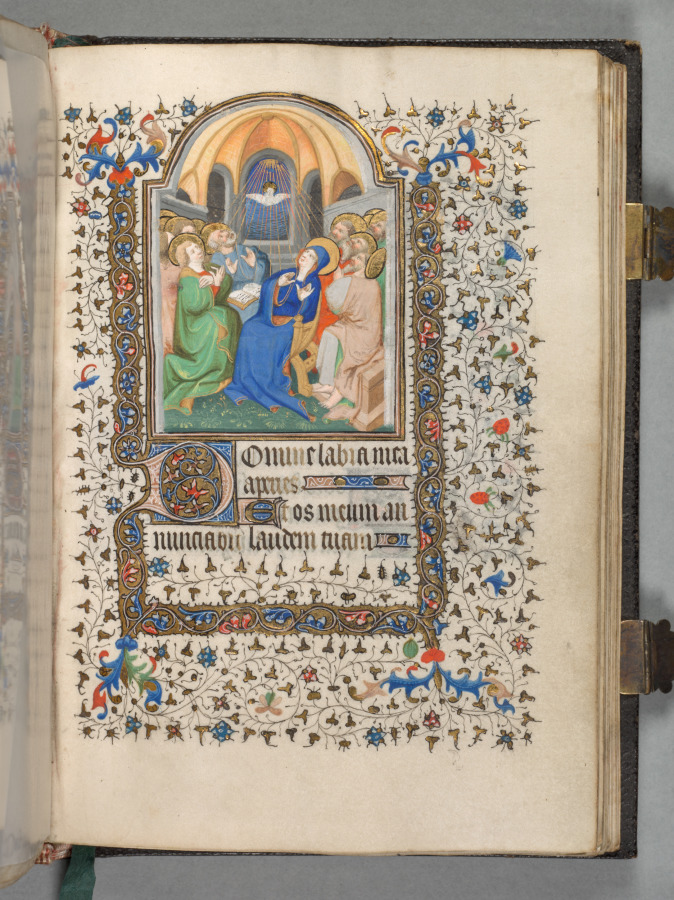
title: Book of Hours (Use of Paris): Fol. 108r, The Pentecost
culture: France, Paris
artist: possibly studio or workshop of The Bedford Master (French, Paris, active c. 1405–30)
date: c. 1420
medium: ink, tempera, and gold on vellum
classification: Bound Volume